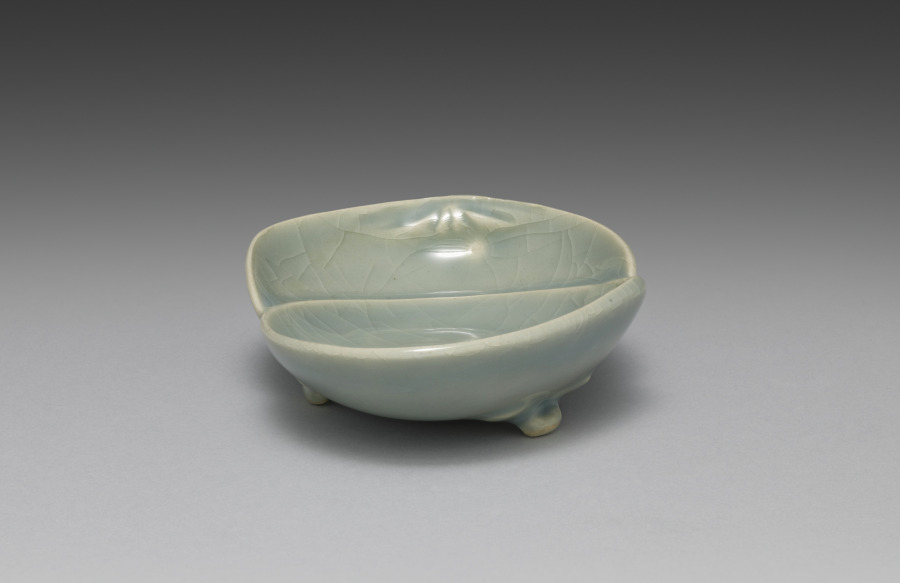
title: Dish from Saucers with Matching Shells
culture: Japan, Meiji period (1868–1912)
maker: Seifū Yohei III (Japanese, 1851–1914)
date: 1893–1914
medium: Porcelain with molded design and green crackled glaze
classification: Ceramic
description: Yohei III’s main output for his sophisticated clientele was in the form of tea sets and dining sets. He created a range of dishes in green glazes. He often produced in pairs, sets of five, or sets of ten. The set of five dishes with a more complex form is described as having a “water-colored glaze” (mizuiroyū). These are shaped like clam half shells, a reference to a game in which shell halves painted with narrative scenes or a variety of motifs must be matched back together by the players. The dishes have molded details to articulate the shell forms, and the crackling across each shell adds another dimension to the surface. Each dish is set on three small feet, formed by a pinched piece of clay and attached to an unglazed area on the underside of the dish. Curiously, while four of the dishes are stamped with the artist’s mark, one has instead a signature carved into the base.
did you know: Each of the paired-shell dishes has its own compartment in a long, flat box.